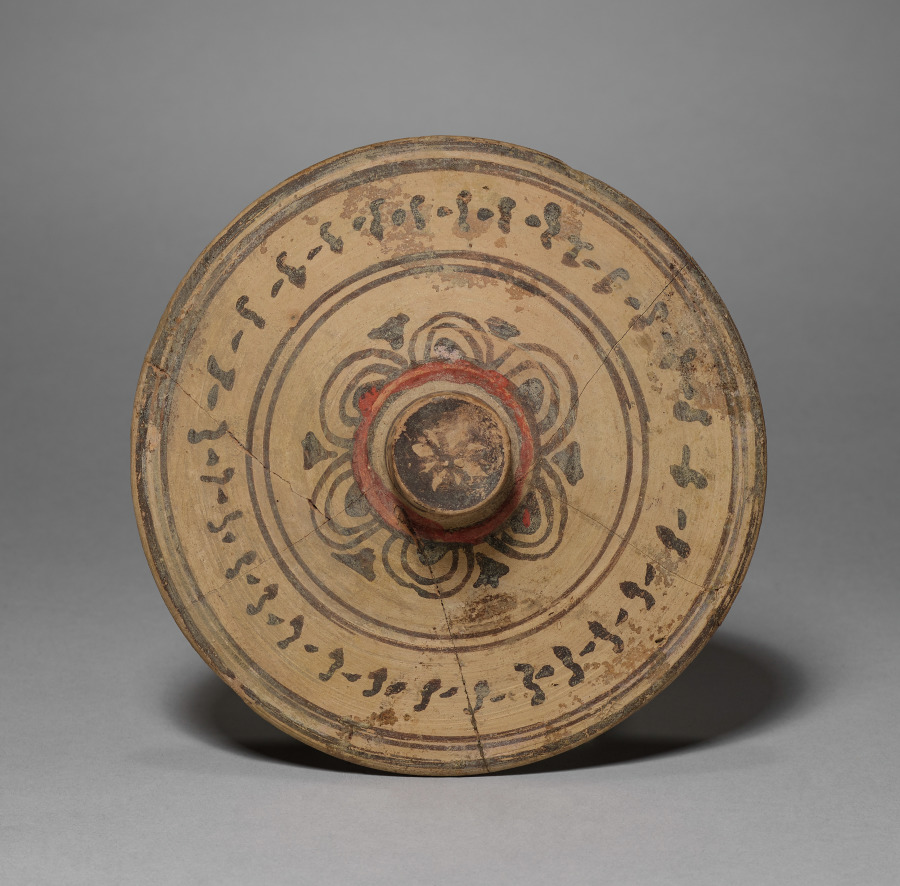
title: Lid for Two-Spouted Strainer Askos (Flask)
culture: South Italian, Daunian or Canosan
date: 300–200 BCE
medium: ceramic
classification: Ceramic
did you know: The lid has been broken and repaired.